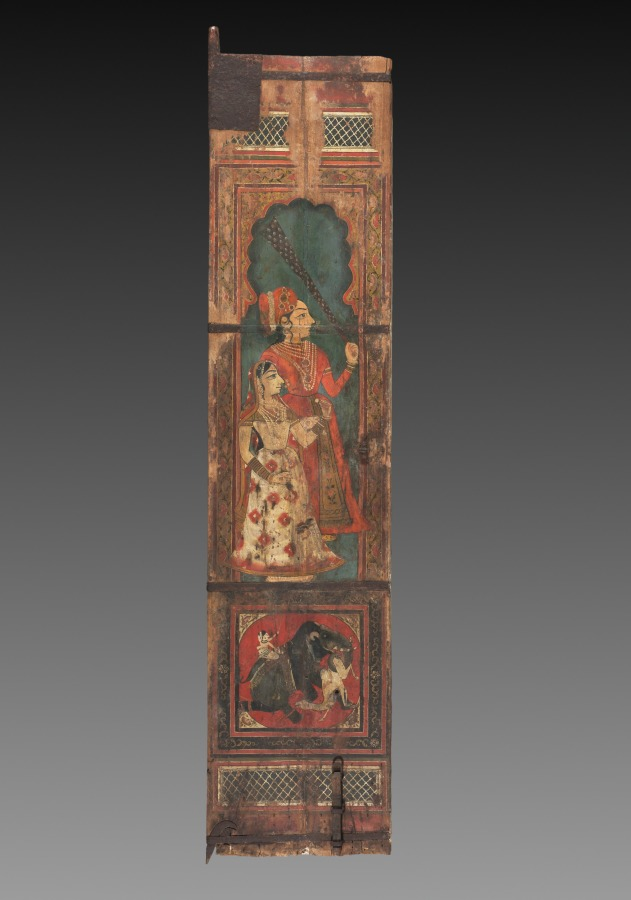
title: Painted Door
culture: Northwestern India, Rajasthan, possibly Rajput kingdom of Bundi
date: c. 1820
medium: color on wood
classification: Painting